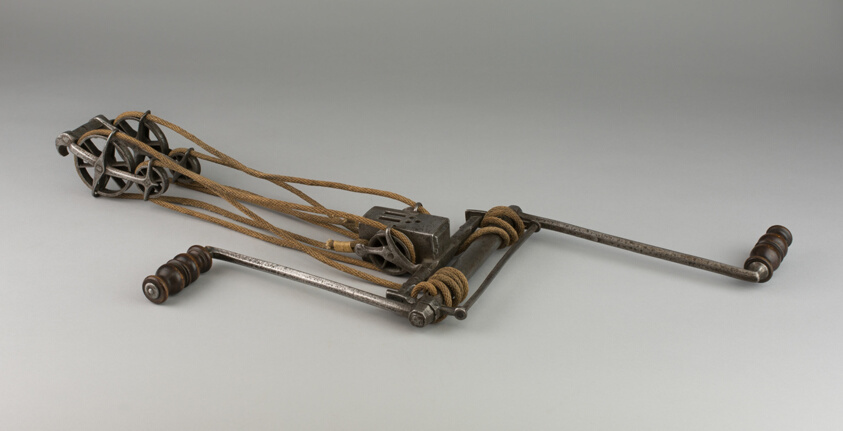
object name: Arms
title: Windlass [pictured on crossbow]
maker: French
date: late 15th/16th century (possibly 19th century in 15th/16th century style)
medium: Iron and wood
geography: France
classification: crossbow; arms; arms and armor